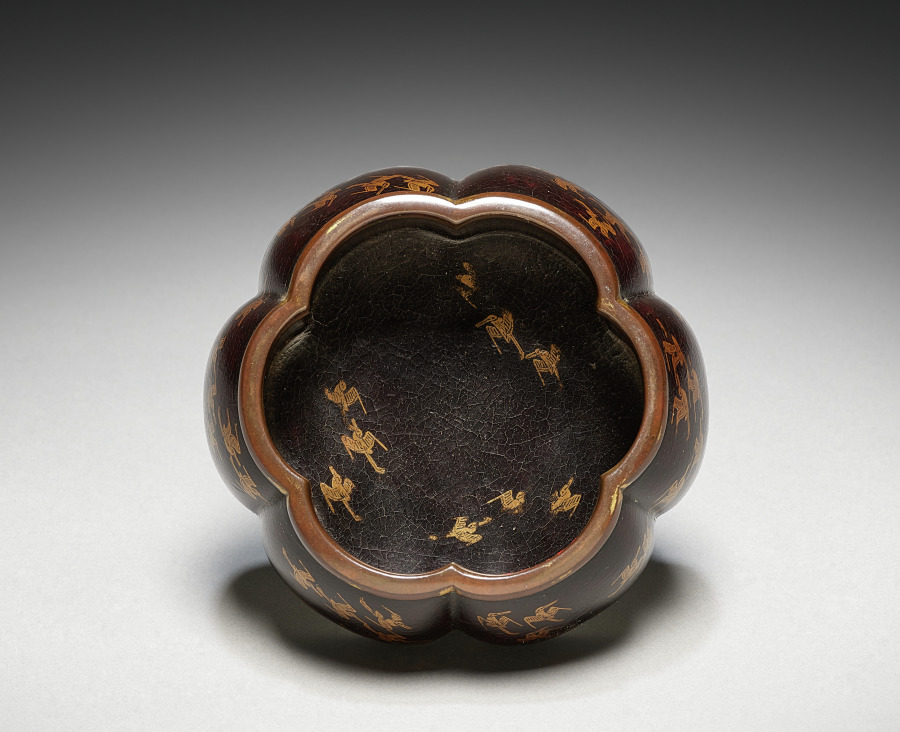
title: Incense Burner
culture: Japan, Nanbokuchō period (1336–92)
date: late 1300s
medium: black lacquer on wood with decoration in maki-e; metal rims; bronze lid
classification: Lacquer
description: This container's repeated, undulating, rounded sides evoke waves over which the articulated plovers sweep. The bronze cover (probably a later addition) mimics the design of a fishing weir. Overall, the container brings to mind the seashore. The earthy quality of the lacquered surface demonstrates the interaction between a man-made pattern (the plovers) and the somewhat unexpected surface of a natural material such as wood.